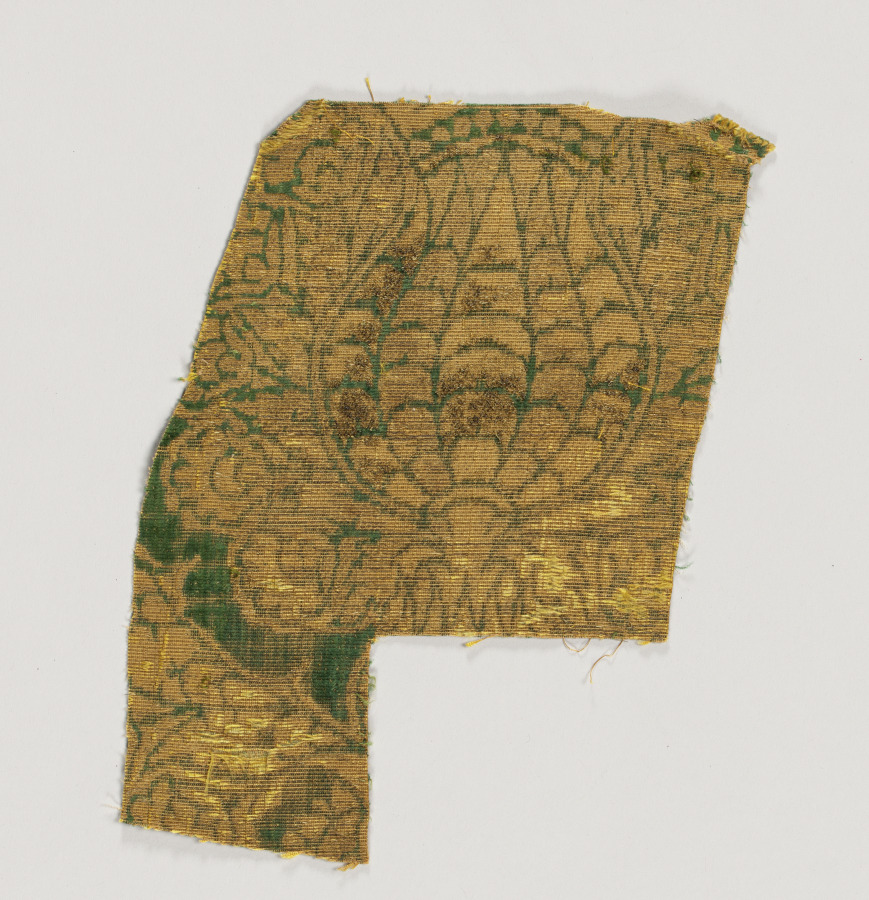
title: Velvet Fragments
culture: Spain, early 16th century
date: early 16th century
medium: velvet (cut, voided, and brocaded): silk and gold thread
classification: Velvet